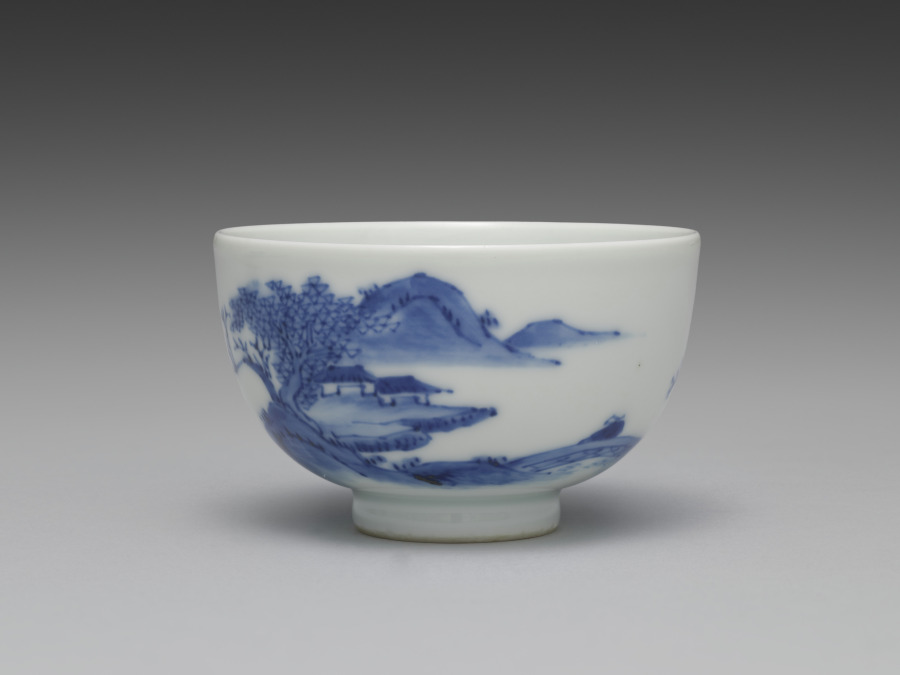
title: Teacup from Tea Set with Chinese Landscape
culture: Japan, Meiji period (1868–1912)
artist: Seifū Yohei III (Japanese, 1851–1914)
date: c. 1893–1914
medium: Porcelain with underglaze blue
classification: Ceramic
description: The theme of this sencha tea set is the Chinese scholar-recluse in an idyllic landscape. Each of the five teacups has a landscape with an architectural structure and some human activity. This tea set has a side-handled pot called a kyūsu, used for steeping, straining, and serving tea. Unlike some others, this set also has a yuzamashi, a container used to cool boiled water to just the right temperature for the best flavor when steeping. Seifū Yohei III’s painting teacher, Tanomura Chokunyū (1814–1907), made a visual record of famous sencha events that shows how these kinds of porcelains fit with objects such as a stove and kettle to form a complete set of utensils for tea preparation, and with ensembles of decorative objects meant to inspire creativity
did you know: A fourth cup shows a humbly dressed man with a broad-brimmed hat lugging a package tied to the end of a rod slung over his shoulder. In front of him is a two-story building flanked by deciduous trees and a man resting against the side of a sturdy stone bridge as he looks at a residence, or perhaps a set of roofed gates, further up the path.